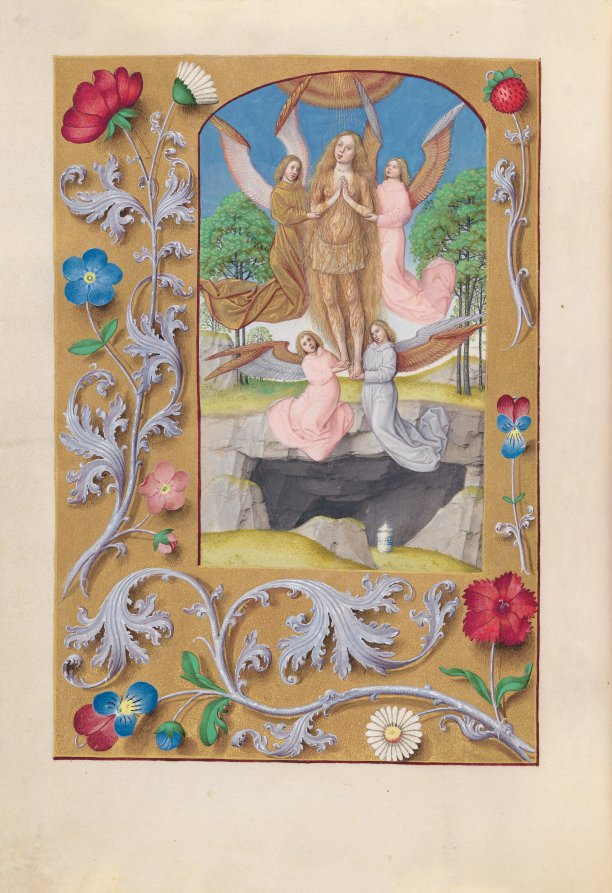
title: Hours of Queen Isabella the Catholic, Queen of Spain: Fol. 193v, St. Mary Magdalene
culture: Flanders, Ghent and Bruges, late 15th century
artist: Master of the First Prayerbook of Maximillian (Flemish, c. 1444–1519)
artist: and Associates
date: c. 1500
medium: ink, tempera, and gold on vellum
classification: Bound Volume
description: This manuscript was illuminated by a circle of at least five highly organized manuscript painters active in the Flemish cities of Ghent and Bruges. The principal illuminator was Alexander Bening, who painted the majority of the book's miniatures. Manuscripts produced by this circle of artists are renowned for the decoration of their borders, which typically feature a rich variety of realistically-painted flowers, birds, and butterflies. This prayer book, called a book of hours, was intended not for a cleric, but for the private devotions of a lay person-in this case, Isabella the Catholic, Queen of Spain (1451-1504). Isabella's coat of arms embellishes the book's frontispiece. It is unlikely that the book was commissioned by the Queen herself; rather, she probably received it as a diplomatic gift from someone courting her patronage, perhaps Cardinal Francisco Jimenez de Cisneros. A Franciscan friar, Jimenez was dependent upon Isabella for his advancement, first to the post of Queen's confessor in 1492, and then to Archbishop of Toledo in 1495.